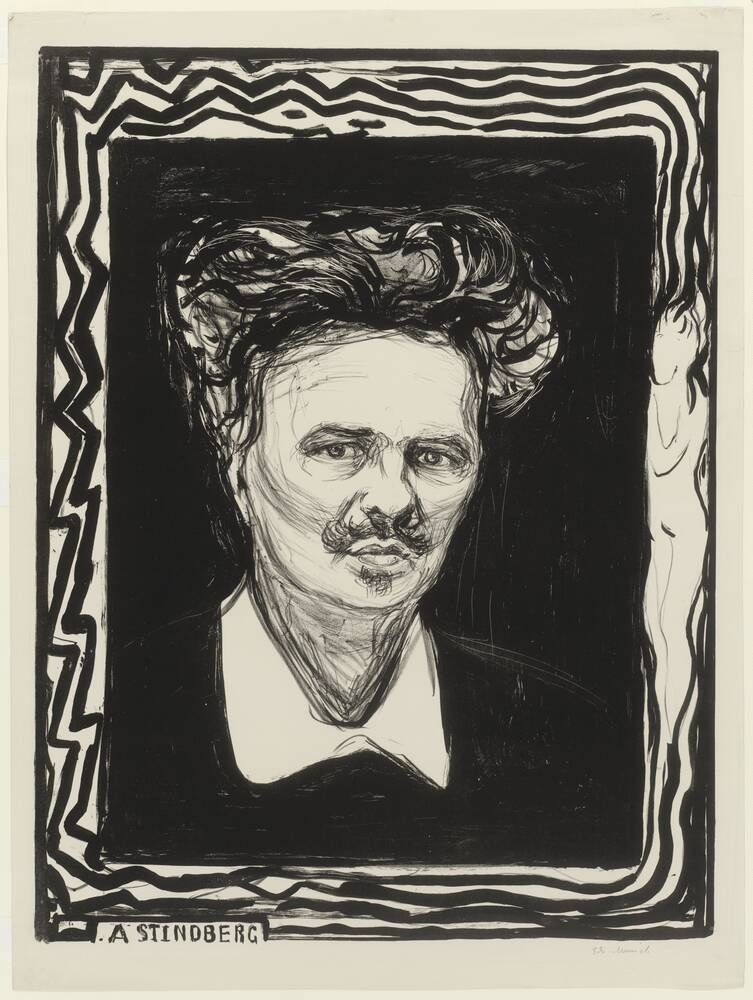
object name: Print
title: August Strindberg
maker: Edvard Munch (Norwegian, 1863-1944)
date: 1896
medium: Lithograph on cream wove paper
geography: Norway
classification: lithograph; print; prints and drawing